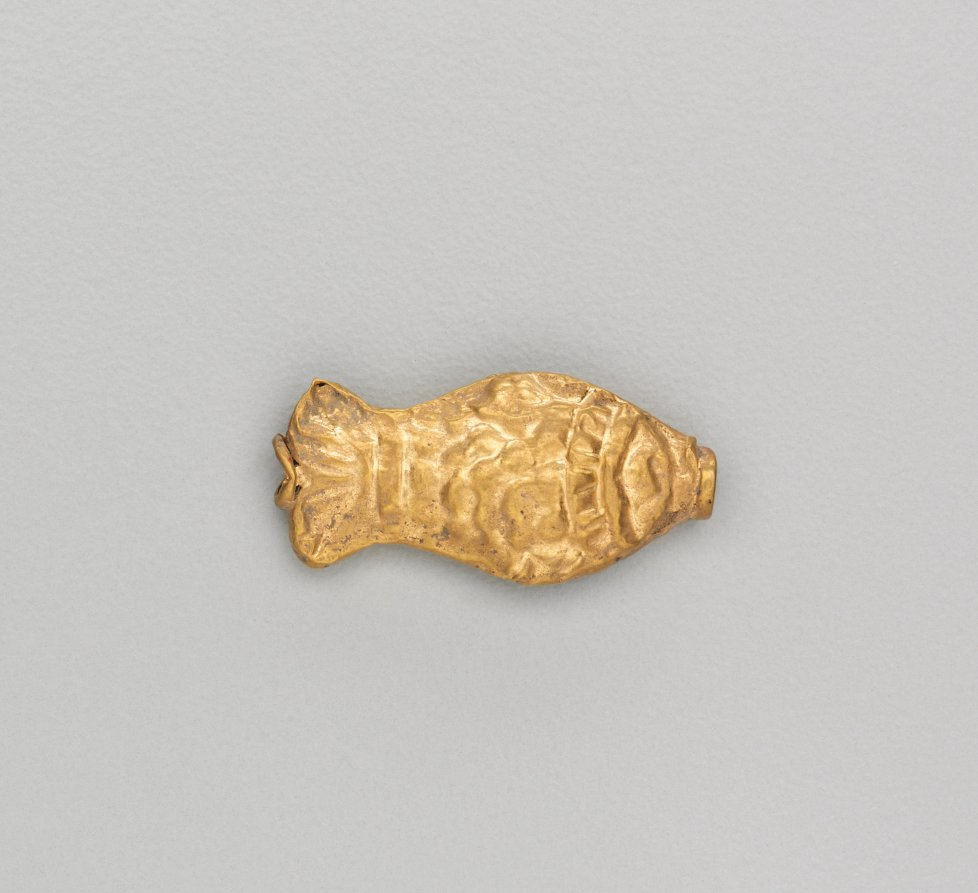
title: Necklace Bead in the Form of a Fish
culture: India, Shunga period (185–78 BCE)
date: 185–72 BCE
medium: gold repoussé with granulation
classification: Jewelry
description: Jewelry in ancient India often consisted of elements associated with water, such as fish and other aquatic plants and animals. Since water is essential for life, imagery that connotes water is life-affirming, or auspicious, and therefore appropriate adornment.